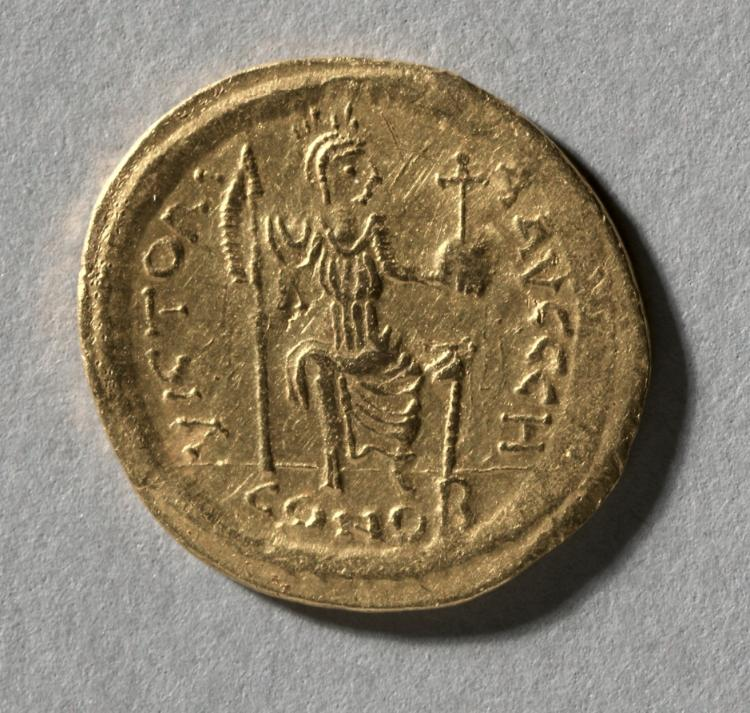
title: Solidus of Justin II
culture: Byzantine, 6th century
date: 565–578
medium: gold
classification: Coins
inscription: (Avers): DNI VST NVSPPAVI (Revers): VICTORI AAVCCCH and CONOB